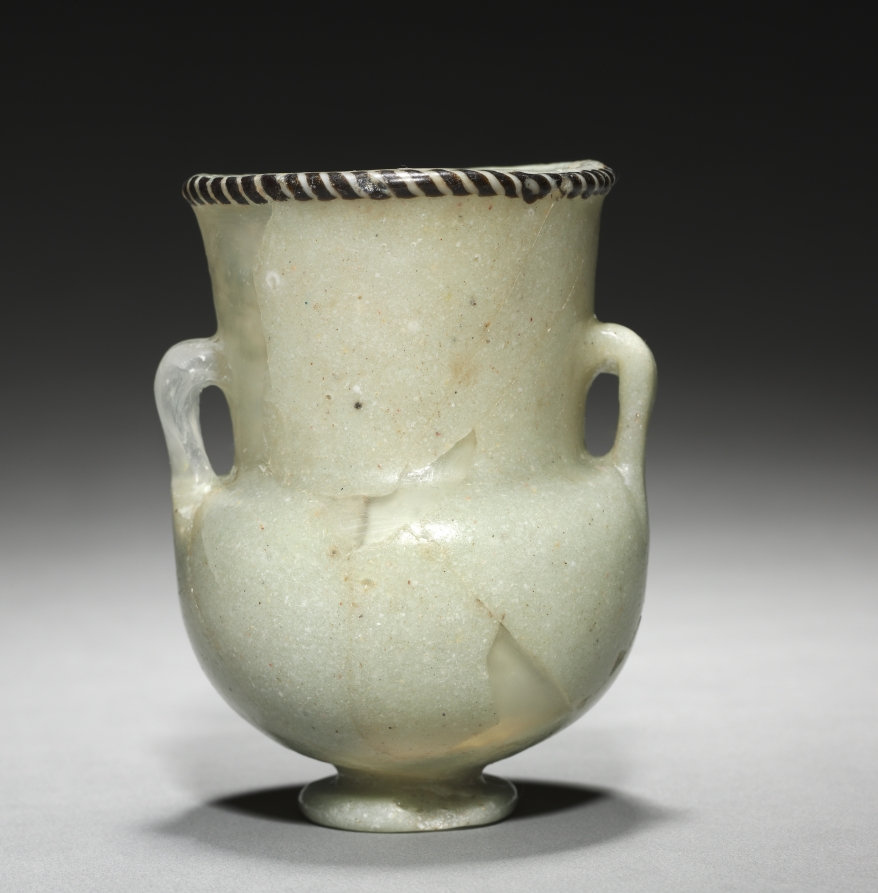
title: Unguent Bottle (Krateriskos)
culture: Egypt, New Kingdom (1540–1069 BCE), Dynasty 18, post-Amarna period or later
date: c. 1336–1295 BCE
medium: glass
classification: Vessels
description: This was probably the most popular type of Egyptian glass vessel. The milky white to sea green-colored fabric and monochrome decorative scheme are reminiscent of Egyptian alabaster. That the Egyptians would make an association between glass and stone is only natural, as the Egyptian name for glass was inr n(y) wdh or "the flowing stone."